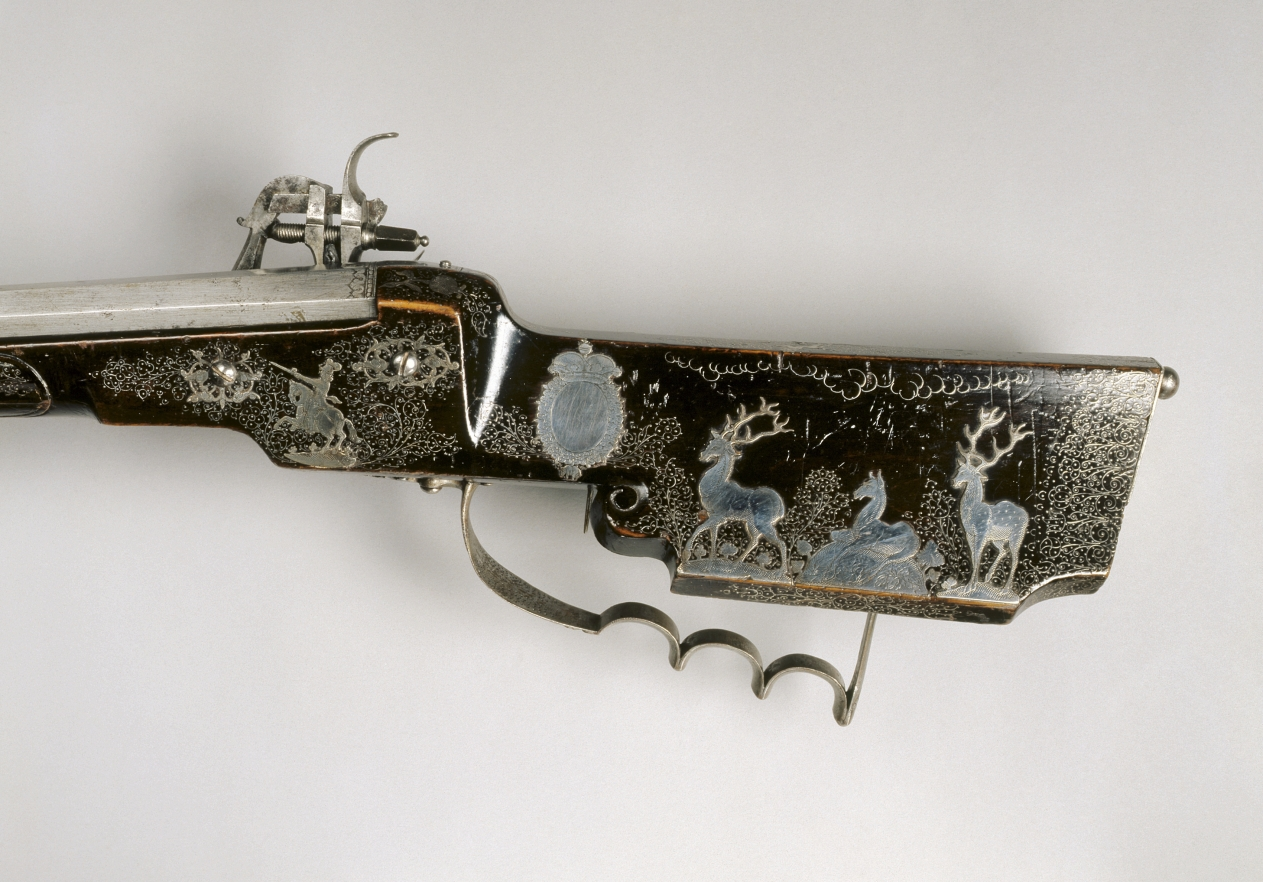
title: Wheel-Lock Hunting Rifle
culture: Austria, Ferlach, mid 17th Century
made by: Hans Schmidt (Austrian, 1669)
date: mid-1600s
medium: steel, varnished wood (walnut) stock decorated with inlaid silver wire and appliqués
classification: Arms and Armor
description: The barrel of this hunting piece is marked with the letters "GS" within a shield, the likely initials of the owner, who was probably a member of the Order of the Golden Fleece as indicated by the escutcheon on the stock.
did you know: A similar rifle made for another member of the Order of the Golden Fleece, Graf Sigmund von Dietrichstein, is preserved in Vienna.